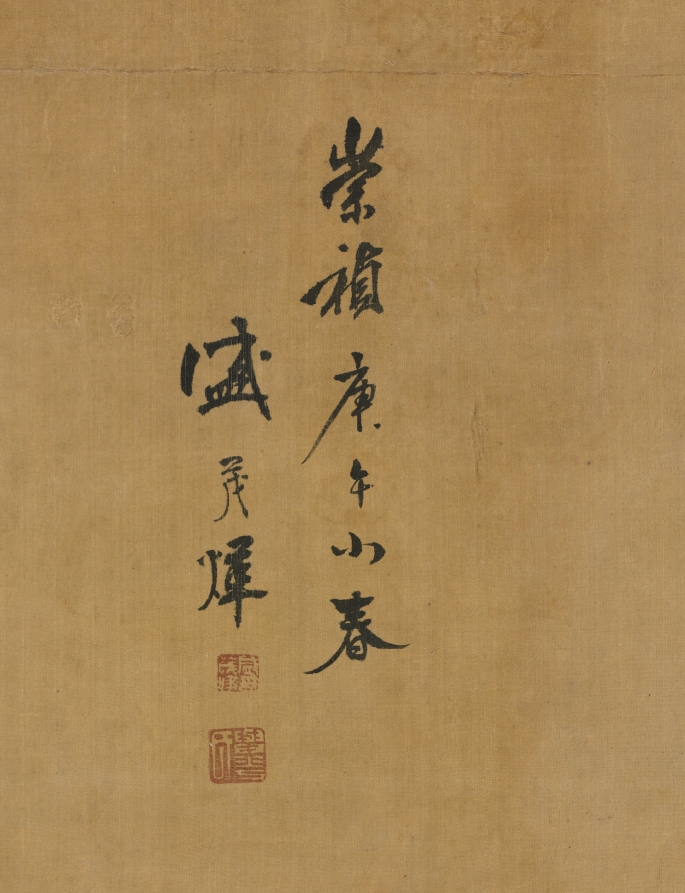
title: Lonely Retreat Overlooking a Misty Valley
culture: China, Ming dynasty (1368–1644)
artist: Sheng Maoye (Chinese, active early 1600s)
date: 1630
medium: hanging scroll; ink and slight color on silk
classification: Painting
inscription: Artist's inscription, signature, and 2 seals: In the tenth month of the gengwu year of the Chongzhen era [1630]. Sheng Maoye [seals] Sheng yin Maoye; Yuhua shi.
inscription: 4 additional seals of Liu Shu (1759–1816)